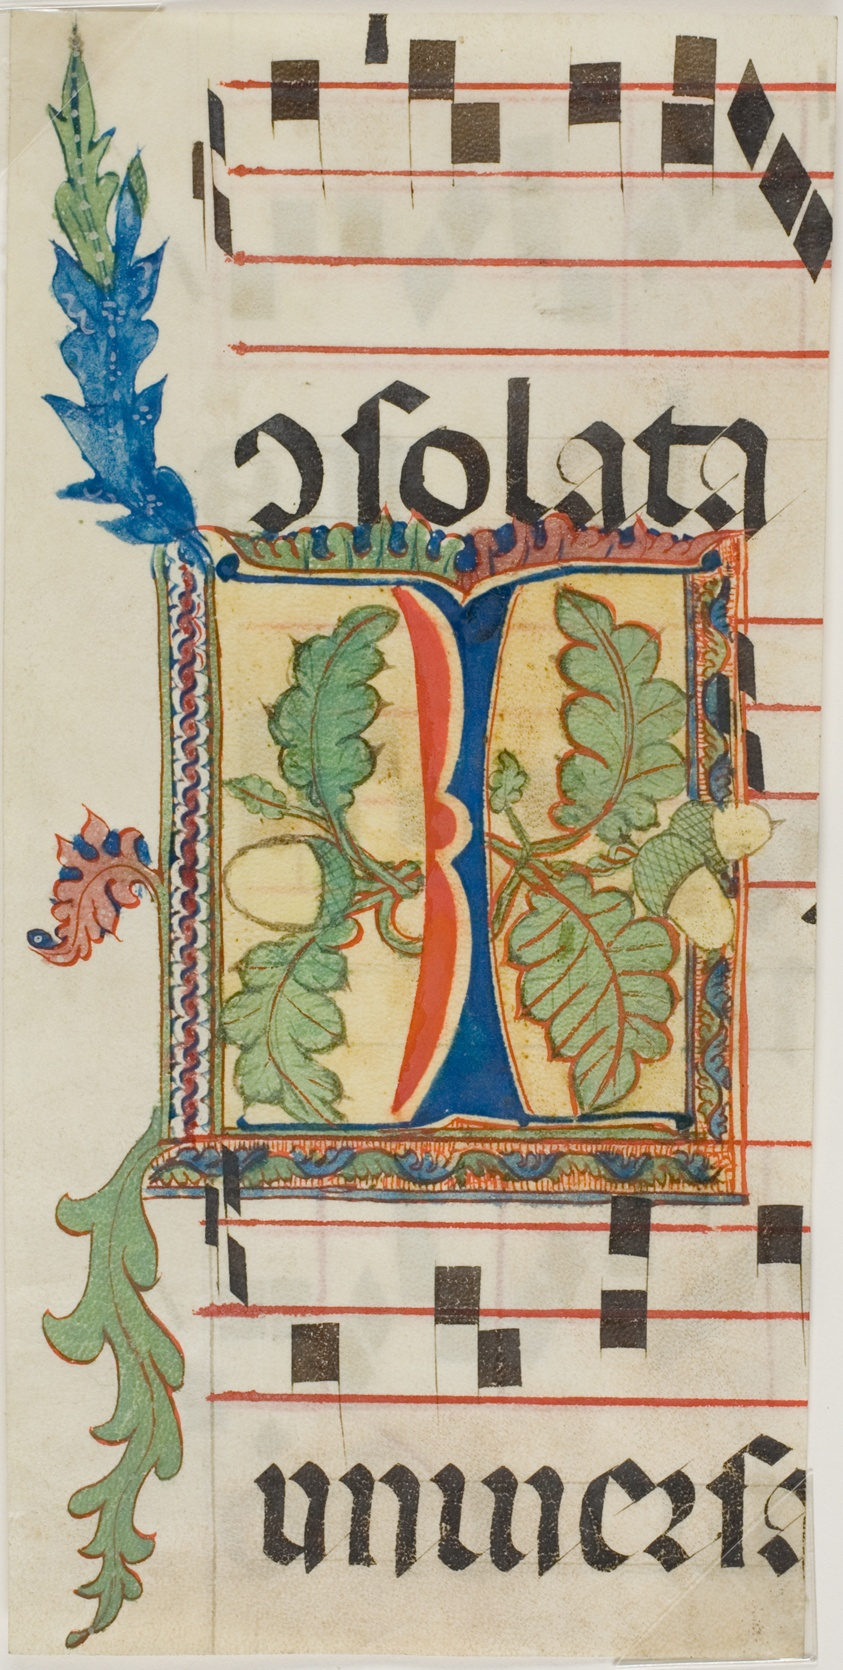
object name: Drawing and Watercolor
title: Decorated Initial "I" with Acorns and Leaves from a Choir Book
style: medieval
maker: European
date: n.d., probably a modern copy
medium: Manuscript cutting in tempera and ink, with Latin inscriptions in black and red ink, ruled in light brown ink, on vellum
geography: Western Europe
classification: tempera; manuscript; drawings (visual works); prints and drawing